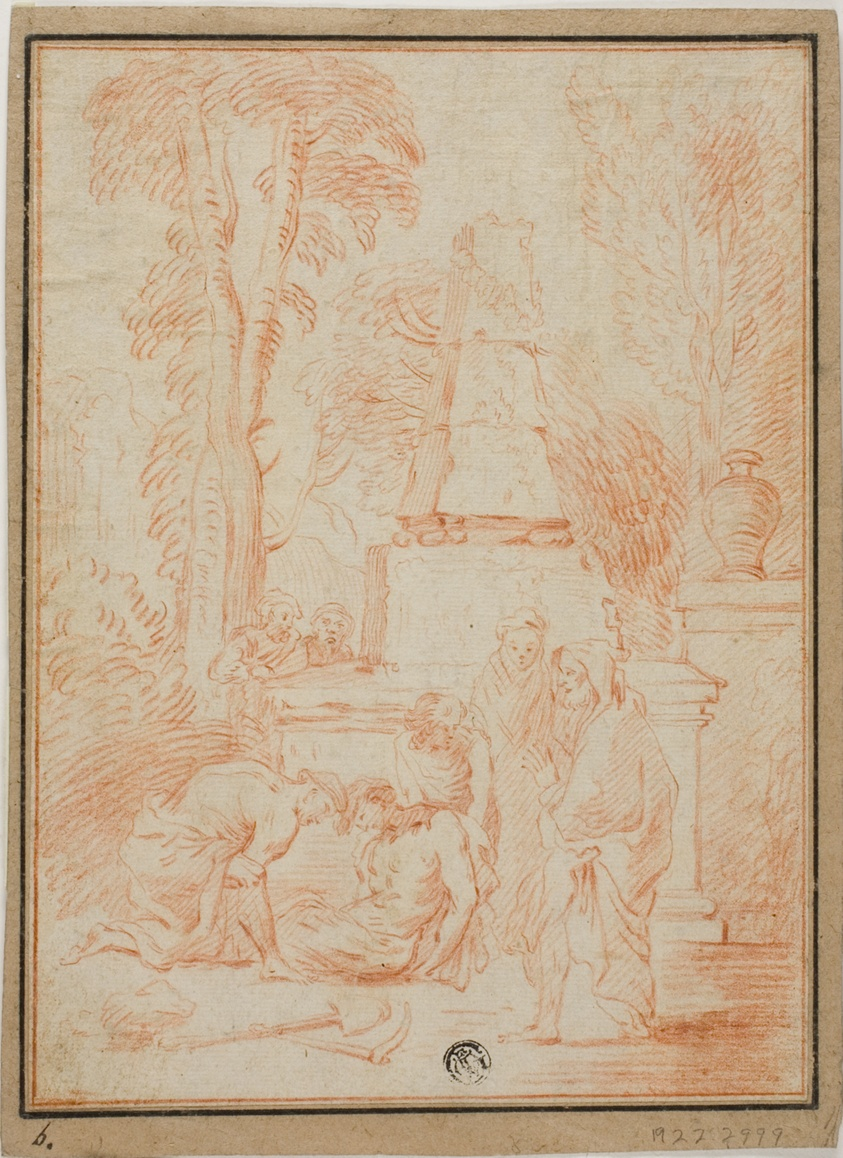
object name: Drawing and Watercolor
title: Tobit Burying the Dead or Funeral of Phocian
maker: After Antoine Watteau (French, 1684-1721); After Andrea di Lione (Italian, 1610–1685) or Giovanni Benedetto Castiglione (Italian, 1609-1664)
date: c. 1710-1750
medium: Red chalk on ivory laid paper, laid down on brown wove paper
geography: Italy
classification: chalk; drawings (visual works); prints and drawing